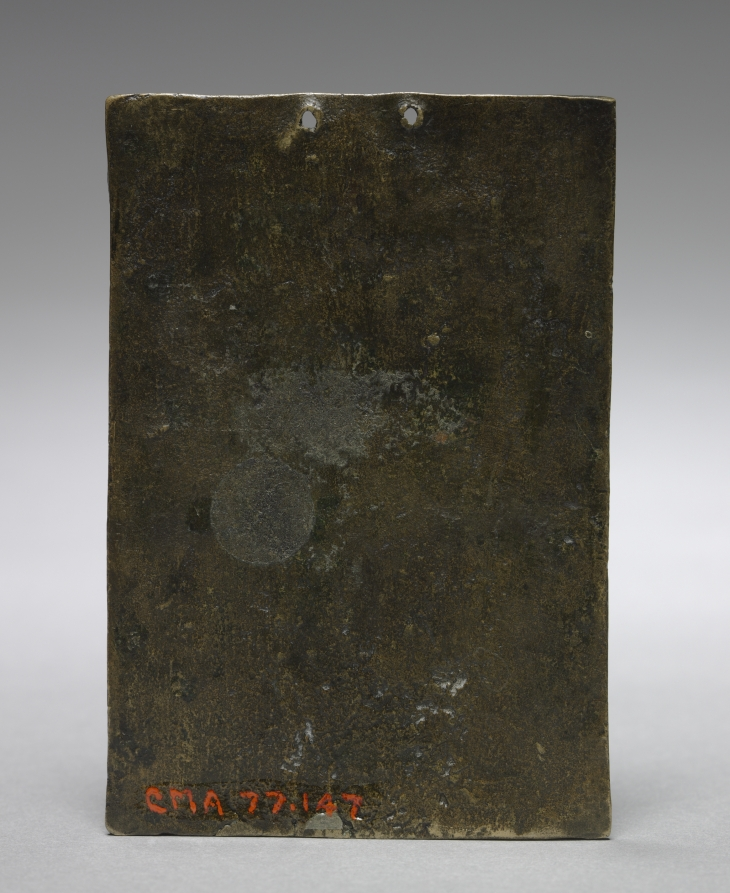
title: The Crucifixion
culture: Italy, 16th century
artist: Moderno (Italian, 1467–1528)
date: 1500s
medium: bronze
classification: Sculpture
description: Moderno's Crucifixion demonstrates his ability to create rhythmic and dramatic compositions on a small scale. The writhing of the crowded figures and tortuous thieves is counterbalanced by the strong, classical body of Christ on the towering vertical of the cross. As the emotional and structural apex of the relief, the serenity of Christ's passing recalls his divine promise of salvation. The Crucifixion was one of Moderno's most popular designs and, after his death, his son Giambattista continued to reissue and rework his father's compositions from the family workshop. These plaquettes were so widely appreciated and influential that there are several variations and generations of Moderno's originals, including ones made well into the 20th century. In fact, another version of the Crucifixion exists in the museum's collection (1969.259), likely a later cast after Moderno's design.